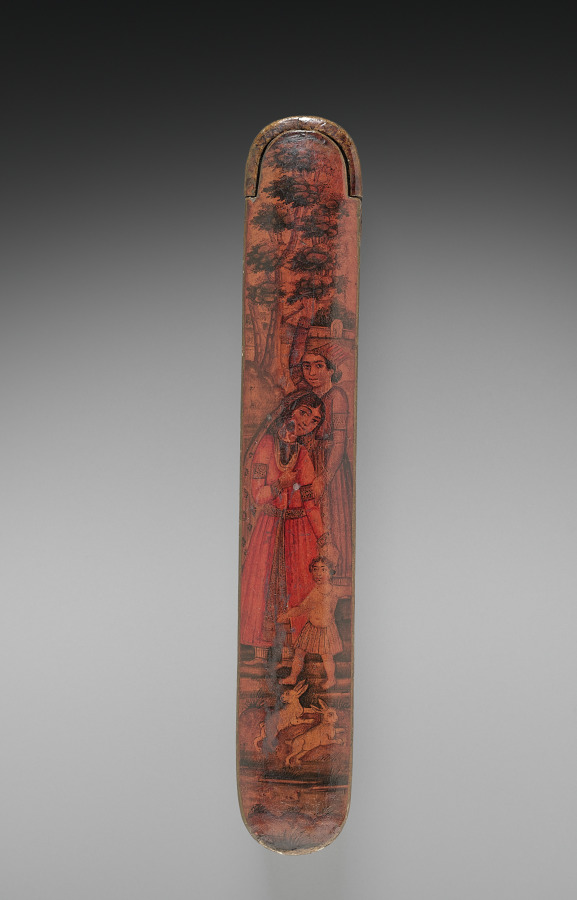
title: Pen and Ink Box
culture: Iran, Qajar period (1779-1925)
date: 1800s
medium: lacquer over papier maché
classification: Lacquer